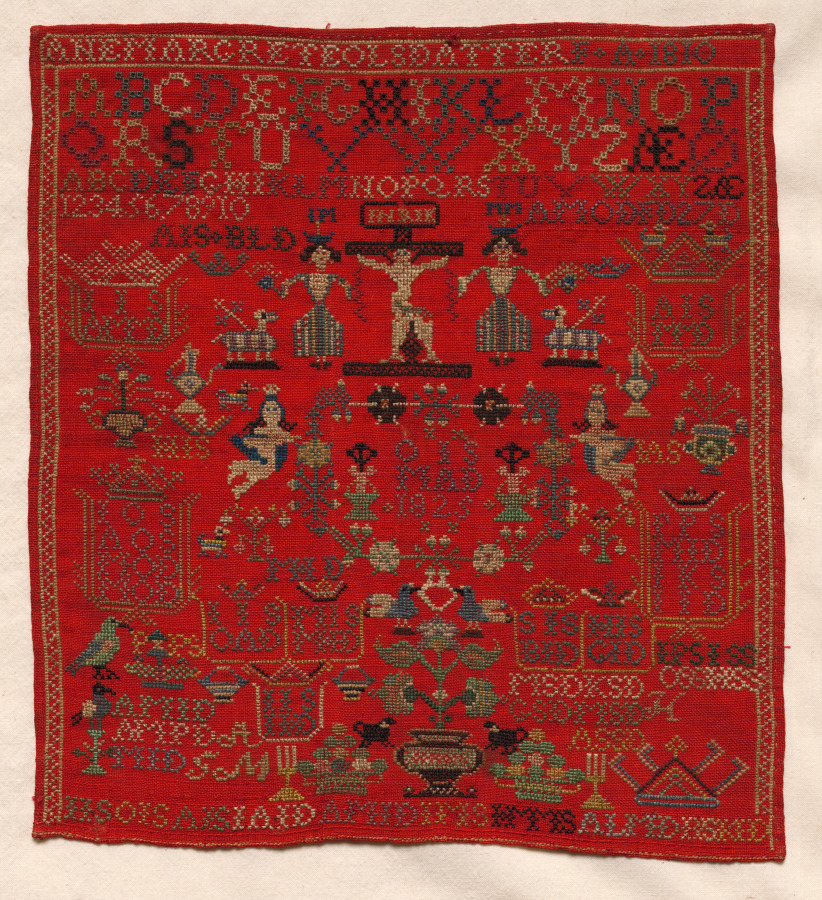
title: Sampler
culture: Norway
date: 1810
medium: Linen, silk, and cotton; embroidery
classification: Sampler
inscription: across top: "ANE MARGRETE OLSDATTER F. A. 1810"; alphabets and numerals in rows beneath.